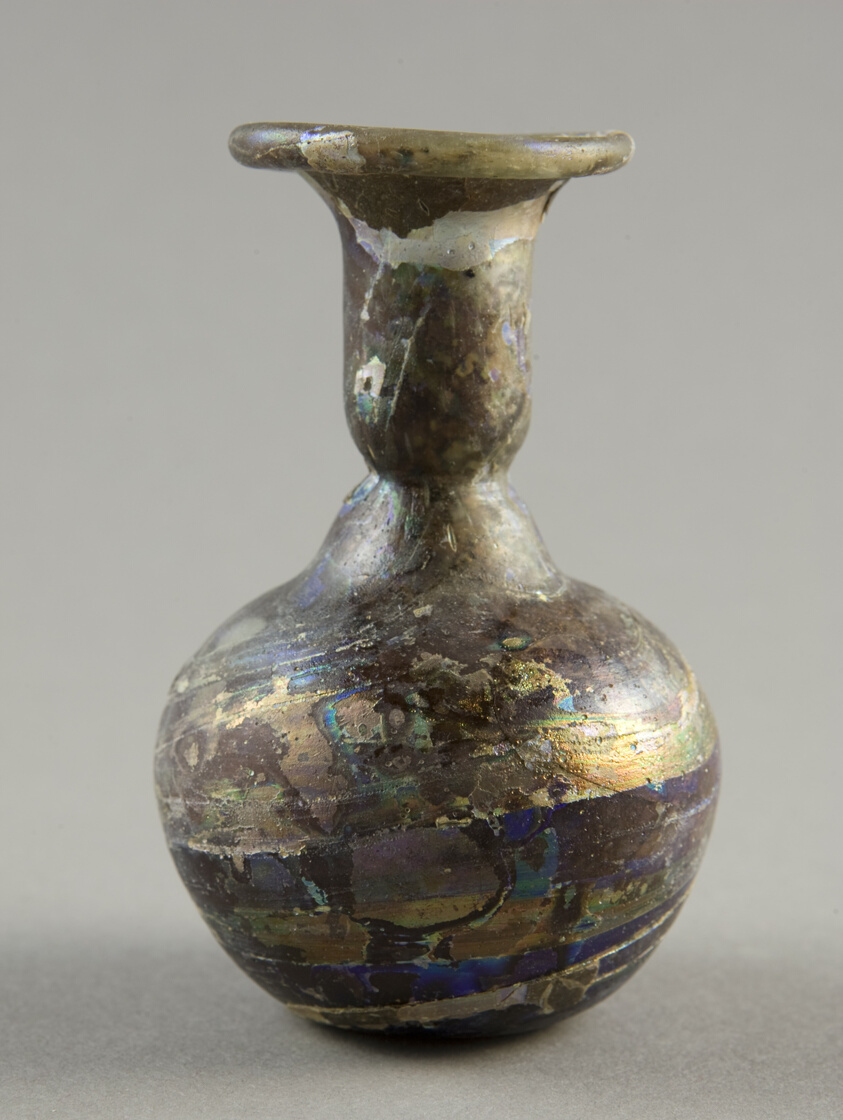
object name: Vessel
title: Bottle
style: syrian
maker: Roman; Syria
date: 2nd-4th century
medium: Glass, blown technique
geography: Syria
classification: bottle; glass; vessel; ancient art